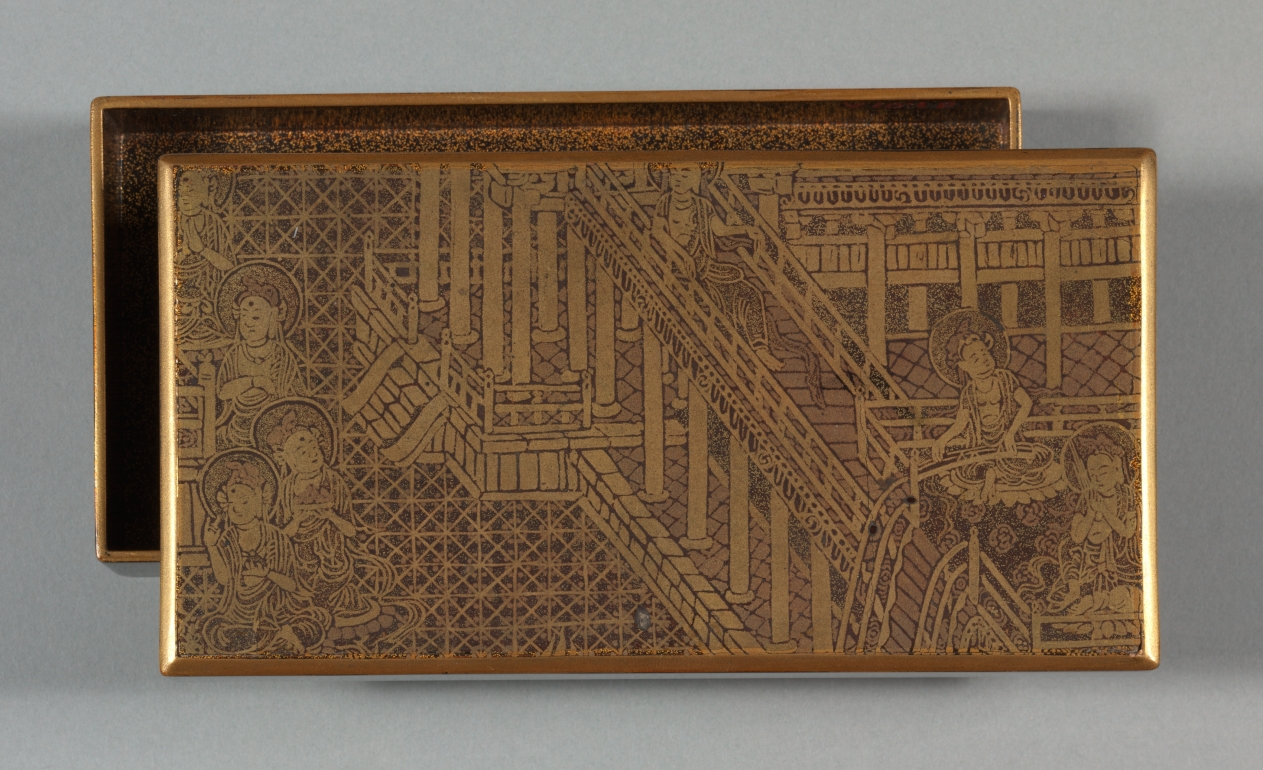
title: Fragment Mounted as a Box Cover with a Scene from Amida's Paradise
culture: Japan, Heian period (794–1185)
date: 1100s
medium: gold lacquer on wood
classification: Lacquer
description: The lid of this box has a fragment of an image representing the Pure Land of the Buddha Amida, and an interior decorated with lotus petals. The original, complete composition may have been a panel housed within a shrine cabinet, and used for meditation. An aversion to discarding sacred images likely led to the fragment’s incorporation into this small box.